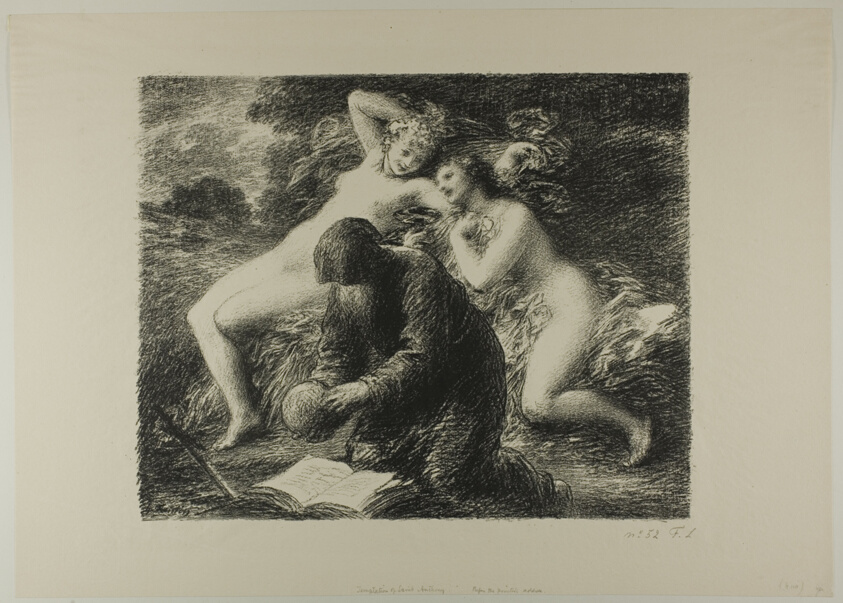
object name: Print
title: The Temptation of St. Anthony, from the third album of L'Estampe originale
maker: Henri Fantin-Latour (French, 1836-1904); printed by Lemercier et cie. (French, founded 1825/28); published by L'Estampe originale (French, 1893-1895)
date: 1893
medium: Lithograph in black on cream laid paper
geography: France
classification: lithograph; print; prints and drawing